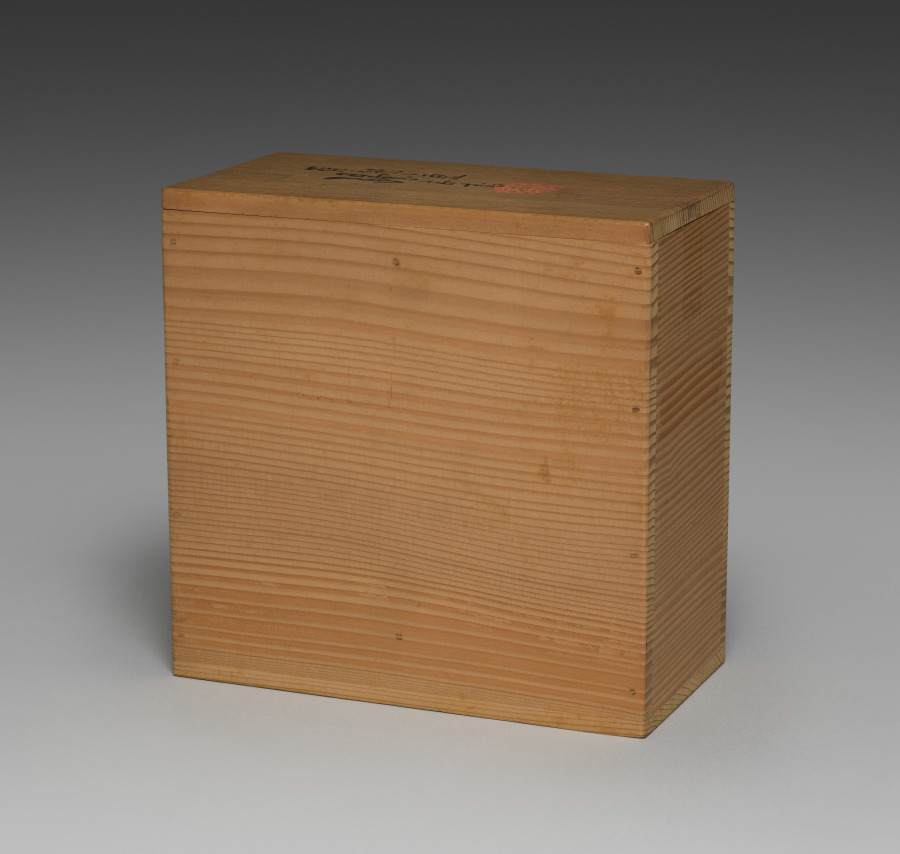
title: Sake Pourers with Crane and Tortoises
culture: Japan, Meiji period (1868–1912)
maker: Seifū Yohei III (Japanese, 1851–1914)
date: 1893–1914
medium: Pair of sake flasks; porcelain with overglaze color enamel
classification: Ceramic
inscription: 爭食羣雞前，同遊者同志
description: One flask of this pair has stencil-like paintings of three turtles—a young one with its parents—while the other has a crane with a leg raised. Cranes and turtles are well-recognized symbols of longevity in East Asia, with the turtle said to live for ten thousand years and the crane for one thousand. Each flask also has a poem on the back, one in Chinese and the other in Japanese. The latter, which appears on the turtle flask, reads kame iwaku kamiyo wa, ore no wakaki toki. The seventeen-syllable poem begins with “turtle” and ends with “when I was young.” It can be translated as, “the turtle said the world of the gods began when I was young.” The poem on the crane flask is two nonconsecutive five-character lines from a poem called “Crane Feelings” by the famous Tang dynasty poet Bai Juyi (772–846). One character in one of the lines has been altered. This creative poetic sampling results in a verse reading zheng shi qun ji qian, tong you zhe tong zhi 爭食羣雞前，同遊者同志. It could perhaps be translated, “before the flock of chickens competing for food, those traveling together have the same ambitions.”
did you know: This pair of seemingly humble sake pourers celebrate longevity and delight in a literary tradition that embraces multiple forms of poetic expression.